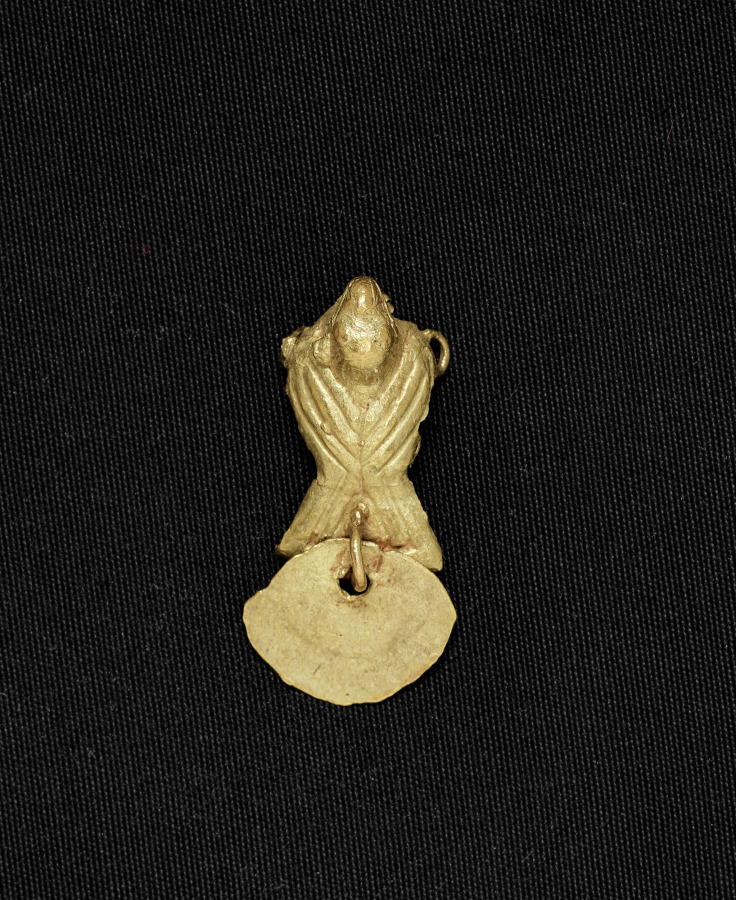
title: Bird Bead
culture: Colombia, Muisca style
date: c. 900–1550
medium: cast gold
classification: Jewelry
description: Muisca metalwork divides into two categories: ornaments to be worn, such as these, and offering figurines, in the case to the right. The elaborate bird pendant features delicate herringbone moldings, openwork patterns, and wing details-all part of the wax model from which the pendant was cast (see nearby computer animation). The dangles were attached after casting.